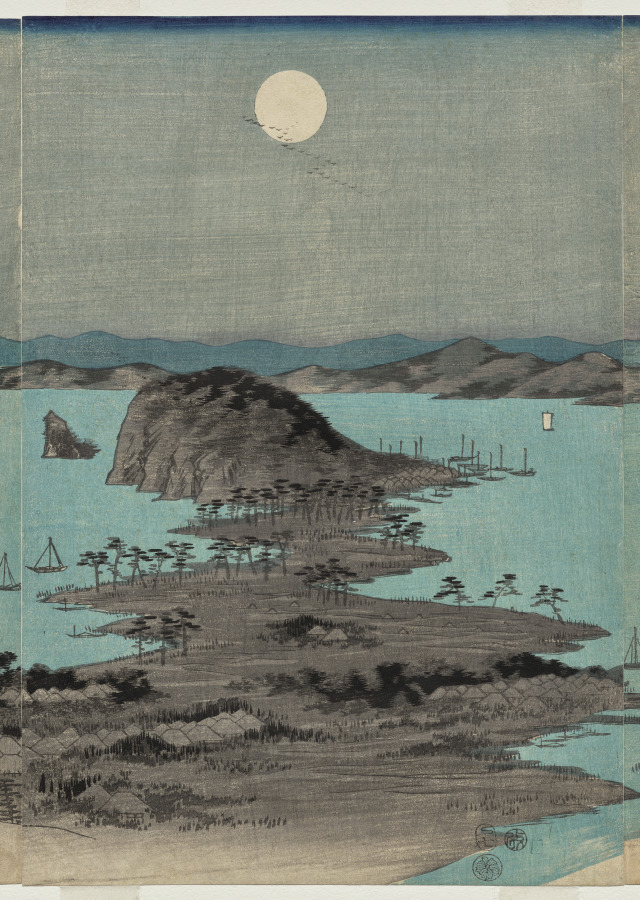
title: Evening View of the Eight Famous Places near Kanazawa Under Full Moon in Musashi Province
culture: Japan, Edo period (1615–1868)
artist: Utagawa Hiroshige (Japanese, 1797–1858)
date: 1857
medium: One of a triptych of color woodblock prints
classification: Print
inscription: Signature: Hiroshige hitsu Publisher: Okazawaya Taheiji (emblem) Censorship Seal: aratame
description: Late in his career, Hiroshige explored the poetic theme of setsugekka, “snow, moon, and flowers,” in a set of three triptychs. This panoramic scene shows the autumn moon over Kanazawa, near Tokyo. Hiroshige’s contemporaries would have recognized the coastline dotted with villages, fishing boats, and the distinctive double-arched bridge at the bottom right.